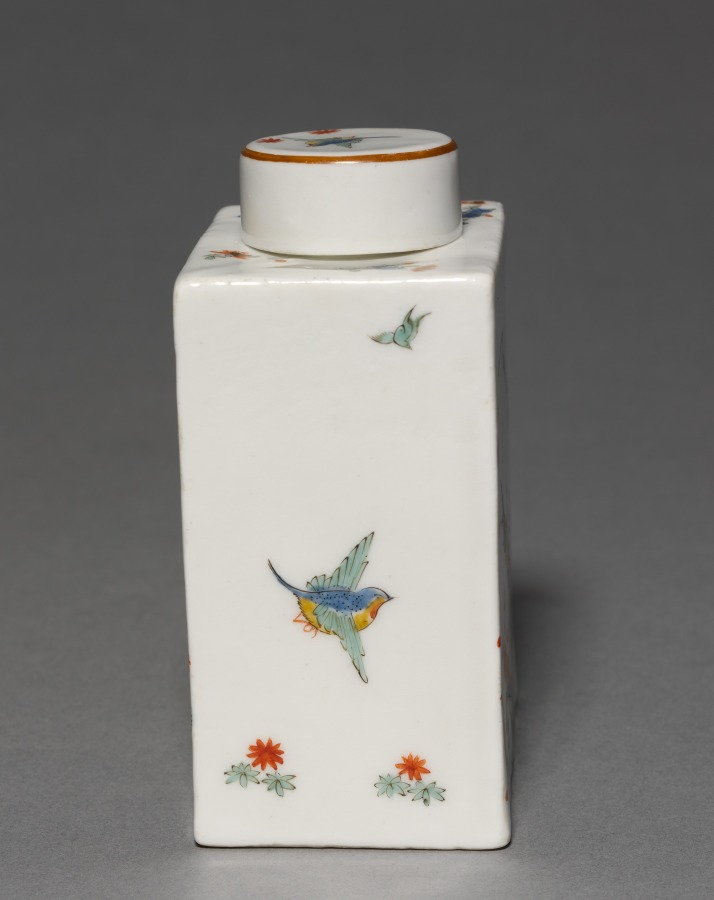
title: Tea Caddy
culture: Germany, Meissen, 18th century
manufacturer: Meissen Porcelain Factory (German, est. c. 1710)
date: c. 1735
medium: porcelain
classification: Ceramic